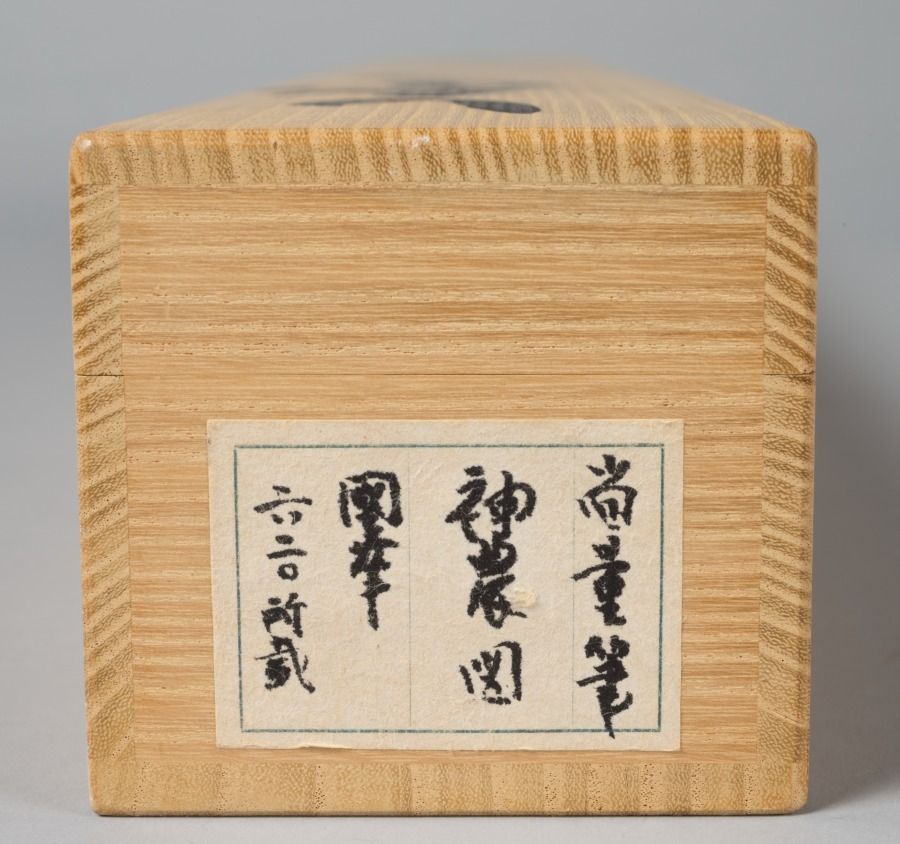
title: Shennong (Shinnō)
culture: Japan, Muromachi period (1392–1573)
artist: Shōryō (Japanese)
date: late 1400s–early 1500s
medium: hanging scroll; ink on paper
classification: Painting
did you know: Shennong legendarily taught people how to farm and also how to use plants as medicine.